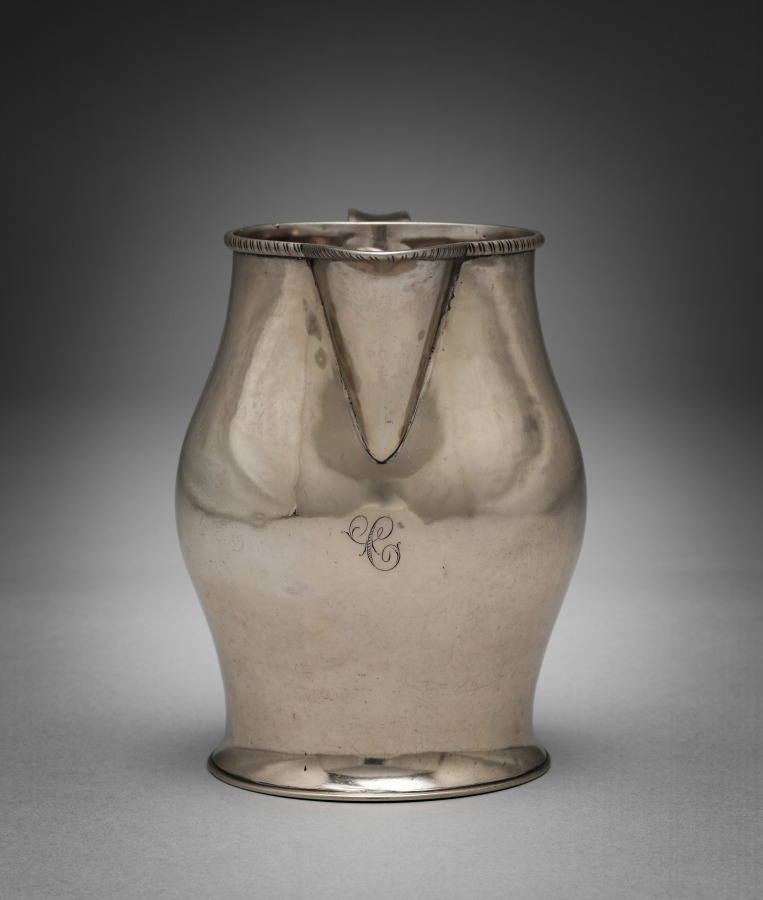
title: Pitcher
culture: America, probably Massachusetts, 19th century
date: 1800–1810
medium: silver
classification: Silver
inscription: Engraved on front side: "C".